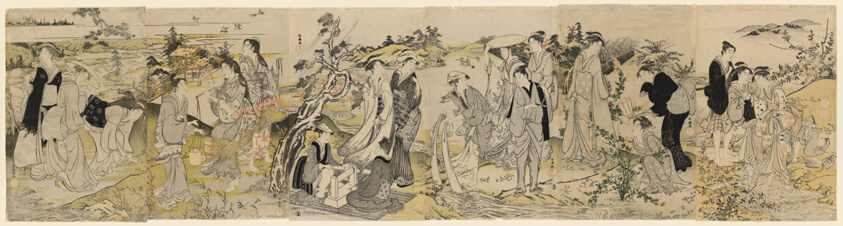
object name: Print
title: The Noda Jewel River, from a hexaptych depicting the Six Jewel Rivers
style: Japanese (culture or style)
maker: Kubo Shunman (Japanese, 1757–1820)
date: c. 1781/89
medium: Color woodblock print; sheet from oban hexaptych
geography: Japan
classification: woodblock print; print; asian art